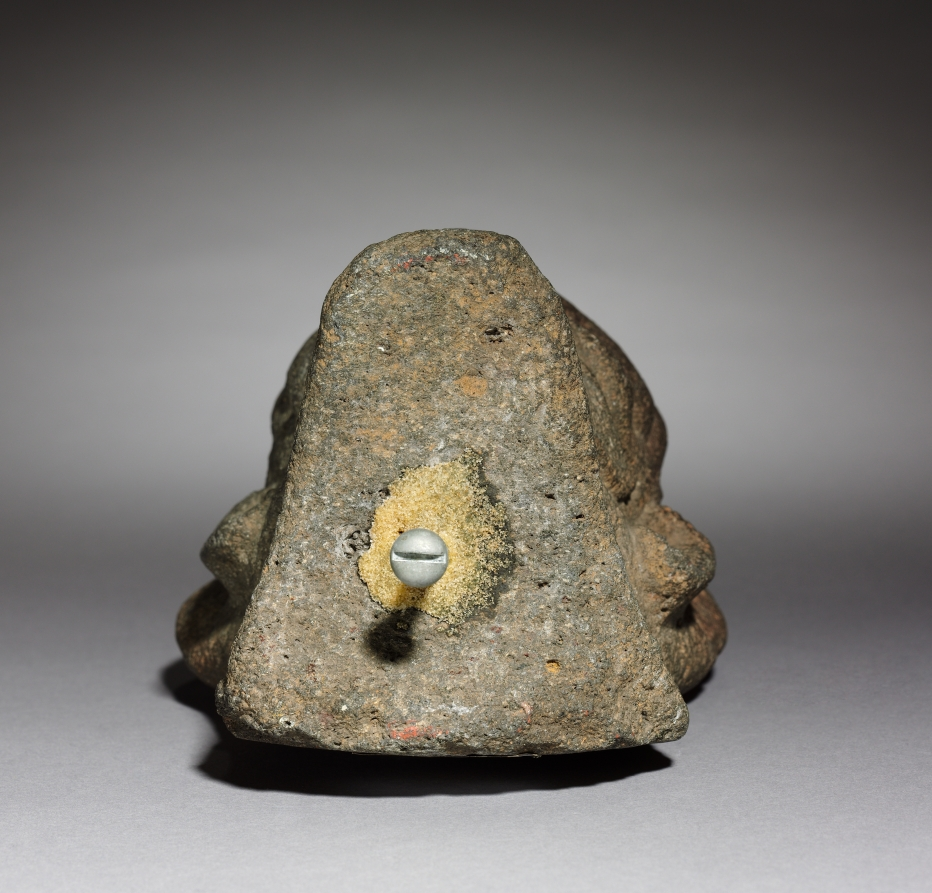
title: Head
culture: Mexico, Classic Veracruz (Totonac or Tajin)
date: 600–1100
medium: stone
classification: Sculpture